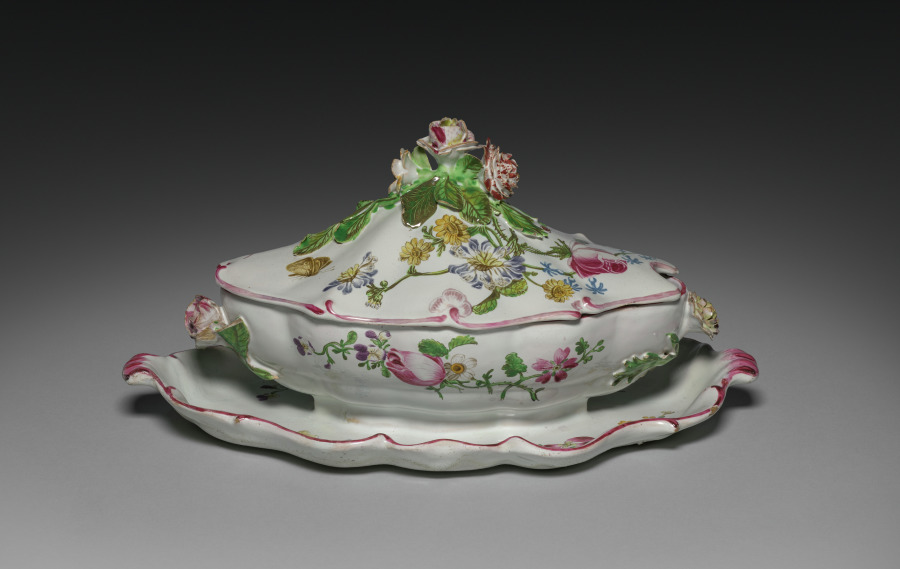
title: Covered Sauce Tureen with Attached Stand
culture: France, Marseilles, 18th century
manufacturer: Veuve Perrin Factory (French)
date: c. 1765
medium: tin-glazed earthenware (faience) with enamel decoration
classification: Ceramic